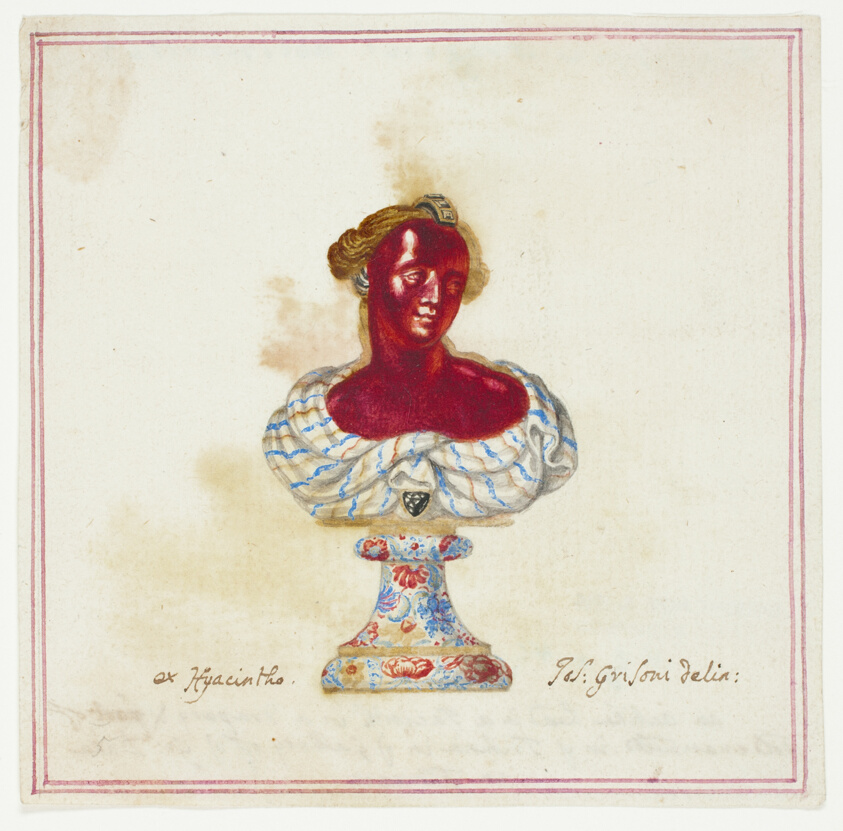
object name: Drawing and Watercolor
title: Sketch of Jewelled Antique Bust in the Medici Collection, Florence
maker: Giuseppe Grisoni (Italian, born Flanders, 1699-1769)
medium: Gouache, heightened with gold paint, over traces of black chalk, on ivory laid paper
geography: Flanders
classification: gouache; watercolor; drawings (visual works); prints and drawing